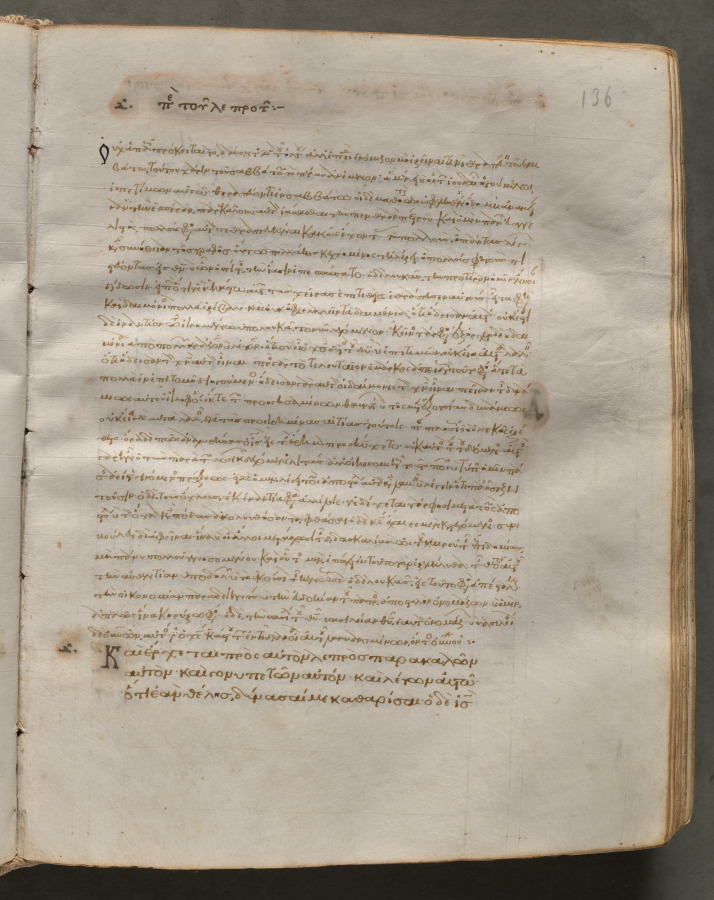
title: Text, folio 136 (recto), from a Gospel Book with Commentaries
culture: Byzantium, Constantinople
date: c. 1000–1100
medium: ink, tempera, and gold on vellum; leather binding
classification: Bound Volume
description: Each of the four gospels in this book opens on a page with brilliantly illuminated borders depicting the author of the text as well as birds-principally peacocks, symbols of the immortality of the soul-and fountains, representing the fountain of life and the salvation of the soul. This volume consists of 428 leaves with texts in Greek. Its level of sophistication suggests that it was probably written and decorated in a monastery in Constantinople.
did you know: Gospel Books were carried in procession through Byzantine churches.